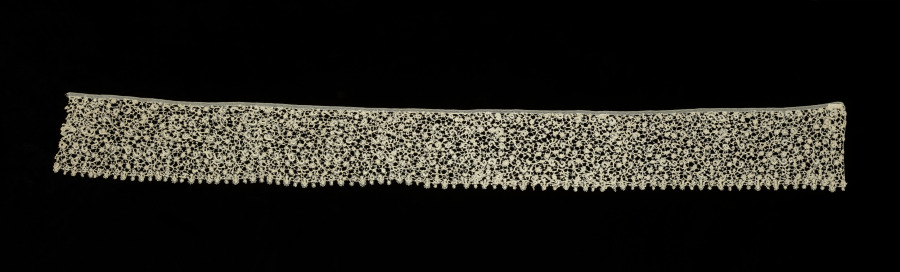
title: Lace Edging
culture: Italy, Venice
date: 1600s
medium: Linen: needle lace (point de niege, rose point, rosalline)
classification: Lace